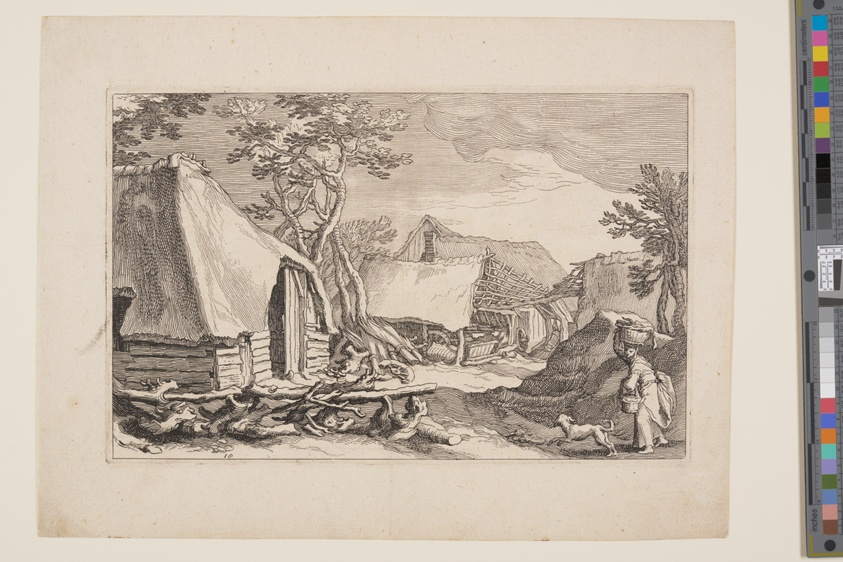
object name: Print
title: Plate 18, from Landscapes with Farmhouses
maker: Boëtius Adamsz. Bolswert (Flemish, 1580–1633); after Abraham Bloemaert (Dutch, 1566–1651)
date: 1614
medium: Etching on ivory laid paper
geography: Flanders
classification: print; paper; prints and drawing; etching